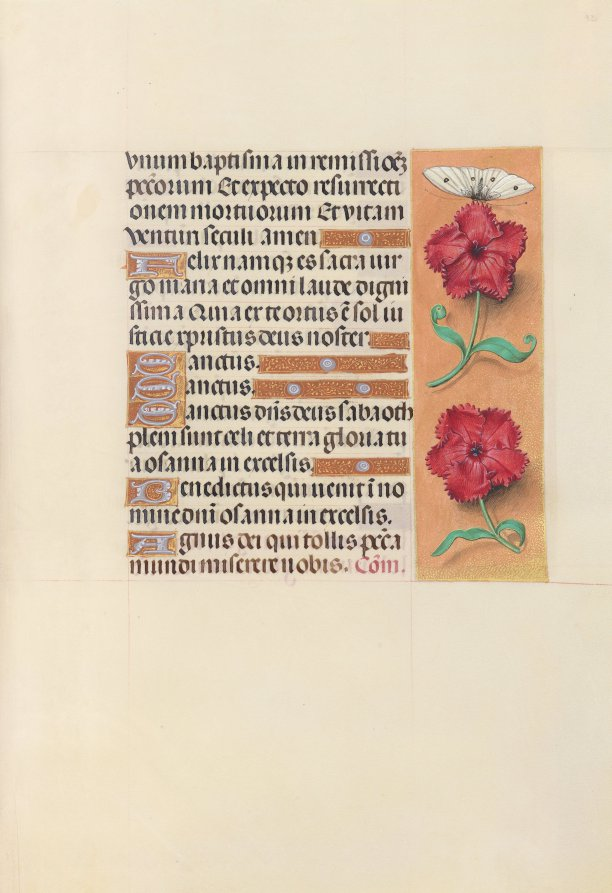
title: Hours of Queen Isabella the Catholic, Queen of Spain: Fol. 92r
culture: Flanders, Ghent and Bruges, late 15th century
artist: Master of the First Prayerbook of Maximillian (Flemish, c. 1444–1519)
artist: and Associates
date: c. 1500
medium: ink, tempera, and gold on vellum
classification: Bound Volume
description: This manuscript was illuminated by a circle of at least five highly organized manuscript painters active in the Flemish cities of Ghent and Bruges. The principal illuminator was Alexander Bening, who painted the majority of the book's miniatures. Manuscripts produced by this circle of artists are renowned for the decoration of their borders, which typically feature a rich variety of realistically-painted flowers, birds, and butterflies. This prayer book, called a book of hours, was intended not for a cleric, but for the private devotions of a lay person-in this case, Isabella the Catholic, Queen of Spain (1451-1504). Isabella's coat of arms embellishes the book's frontispiece. It is unlikely that the book was commissioned by the Queen herself; rather, she probably received it as a diplomatic gift from someone courting her patronage, perhaps Cardinal Francisco Jimenez de Cisneros. A Franciscan friar, Jimenez was dependent upon Isabella for his advancement, first to the post of Queen's confessor in 1492, and then to Archbishop of Toledo in 1495.